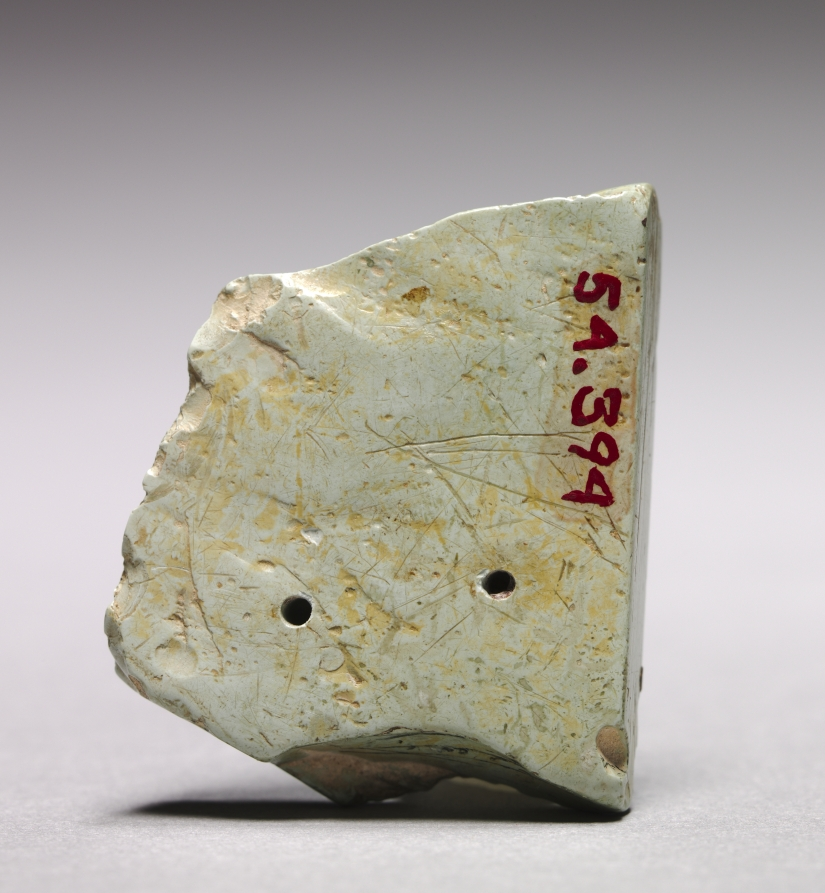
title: Fragment of an Icon of the Crucifixion with Mary Magdalene and the Virgin Mary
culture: Byzantium, Byzantine period, 14th century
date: 1300s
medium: steatite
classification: Glyptic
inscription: partial inscriptions above the figures.